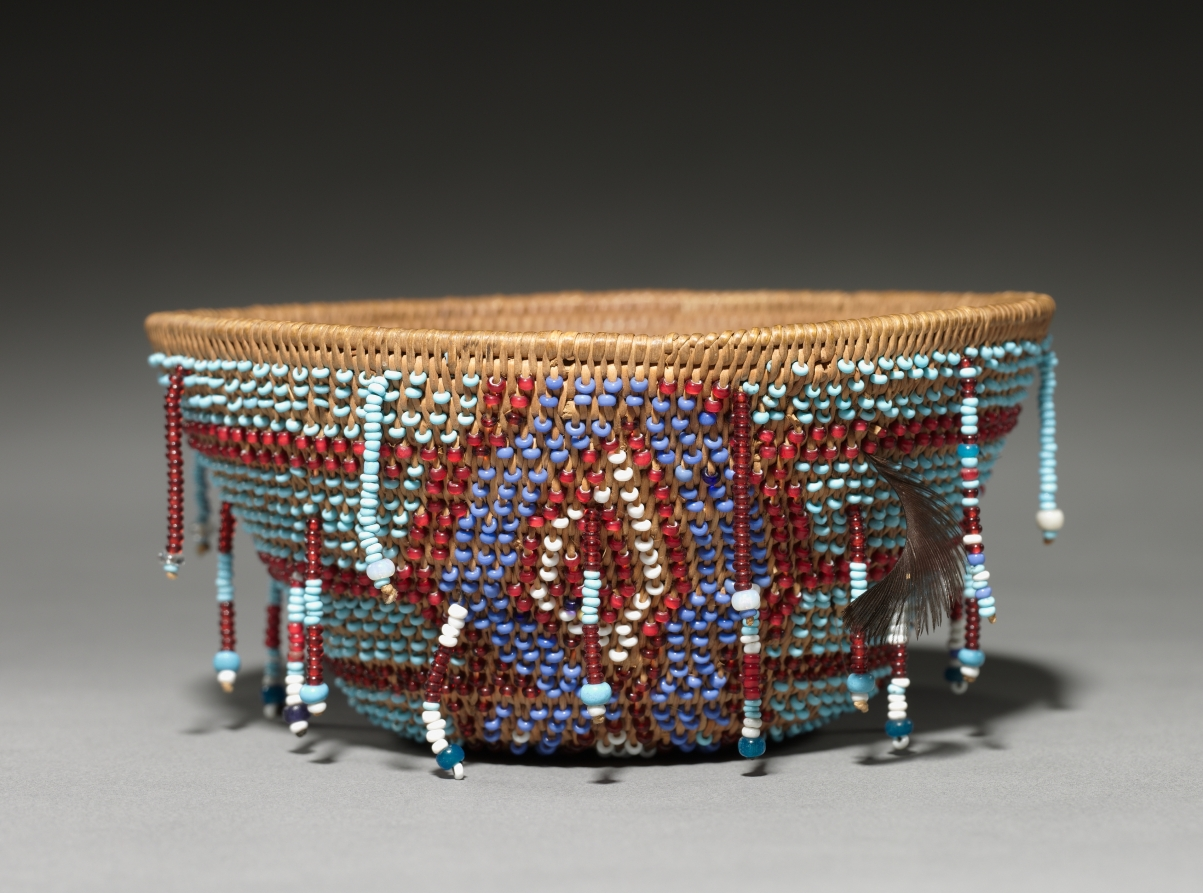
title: Conical Beaded Basket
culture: California, Wappo, Alexander Valley, Late 19th- Early 20th century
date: c. 1875–1925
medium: glass beads and feather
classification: Basketry